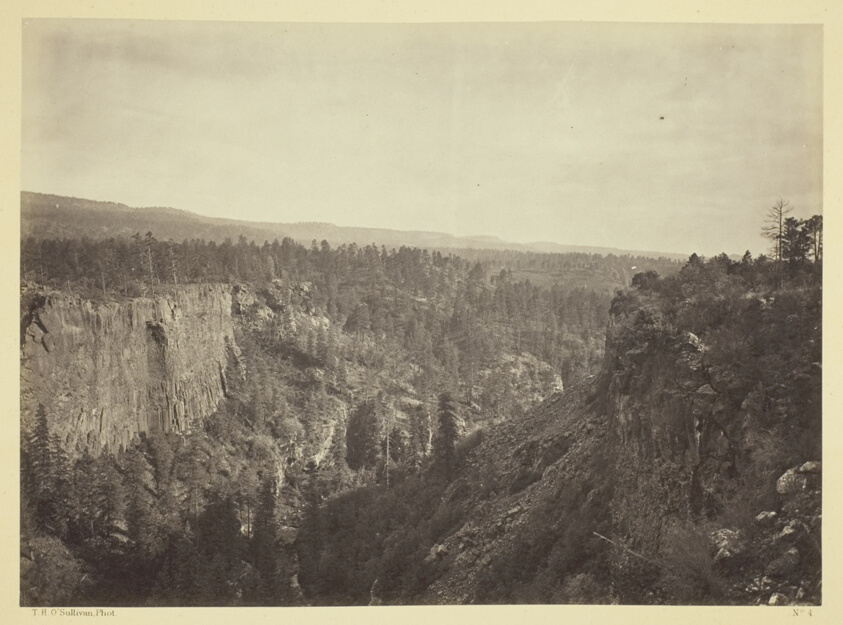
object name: Photograph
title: North Fork Cañon, Sierra Blanca Creek, Arizona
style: 19th century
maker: Timothy O'Sullivan (American, born Ireland, 1840–1882)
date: 1873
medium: Albumen print, from the album "Geographical & Geological Explorations & Surveys West of the 100th Meridian," vol. 1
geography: United States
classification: albumen silver print; photographic process; photography; photograph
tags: Collected by Hugh Edwards